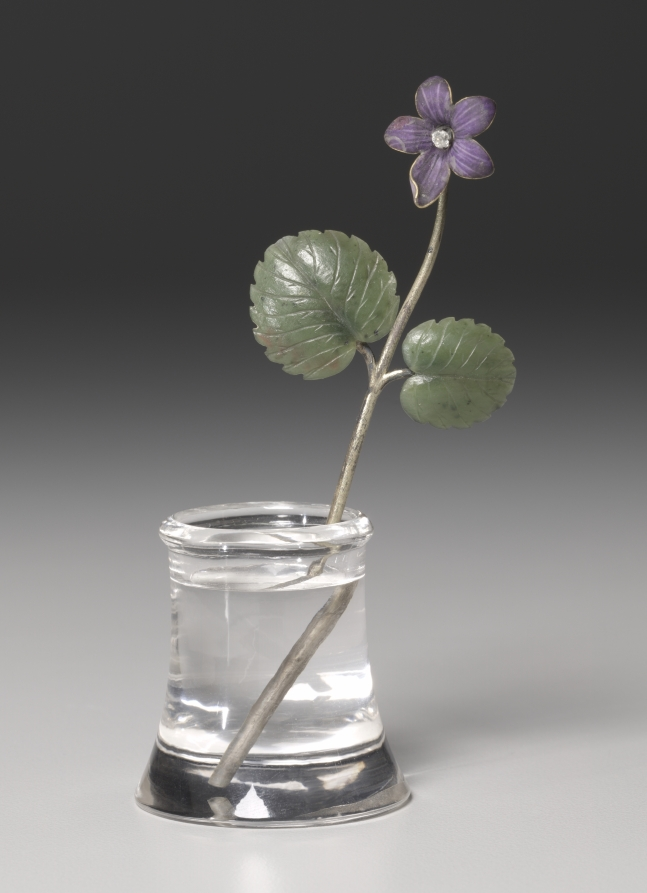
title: Flower Study of a Violet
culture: Russia, St. Petersburg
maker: House of Fabergé (Russian, 1842–1918)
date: c. 1885–1915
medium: enamel, silver gilt, jade, diamond, rock crystal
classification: Miscellaneous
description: This flower study depicts a single stem of violet. Fabergé’s inspiration for his flower studies is said to have come from the floral brooches of precious stones that were made in the 1700s for Catherine the Great as well as from the Japanese art of flower arranging, known as ikebana. Small and delicate, Fabergé’s flower studies were given as intimate gifts to friends by the tsarina and others in the court. She also liked to take them around to wherever the imperial family was residing as a reminder of spring during the harsh Russian winters.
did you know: The stems of Fabergé’s flower studies are set into little basins carved from rock crystal to resemble pots of water.